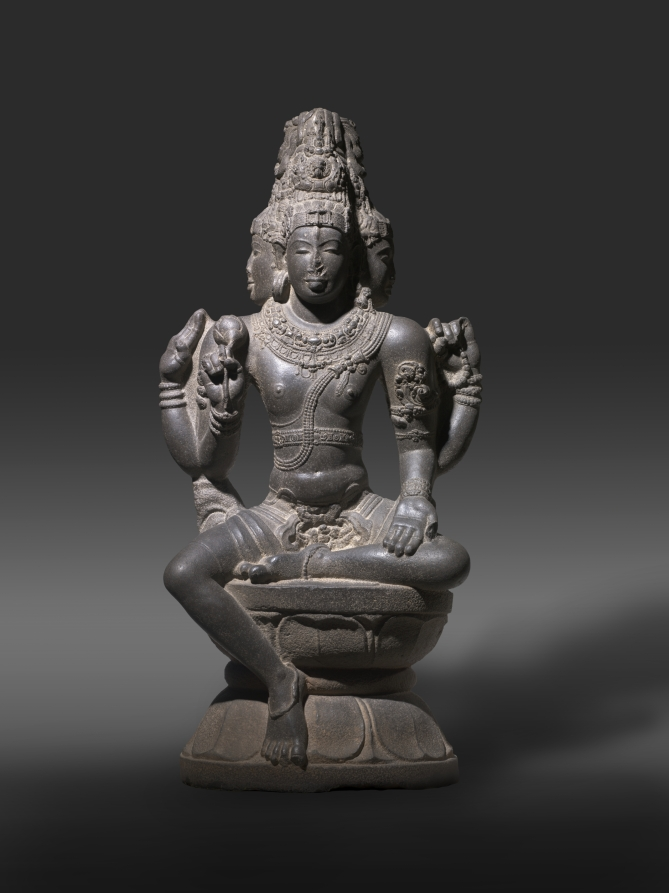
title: Brahma-Shiva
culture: South India, Tamil Nadu, Chola dynasty, late 10th - early 11th century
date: late 900s–1000s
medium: granite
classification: Sculpture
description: In the Hindu pantheon Brahma is in charge of carrying out the work of creation. In this tour-de-force of South Indian temple sculpture, he is in a special regal aspect, with the only elements of his typical priestly appearance being the prayer beads and the matted dreadlocks piled on his head. Four arms connote superhuman power, and four heads convey the idea that his creative activities spread in all four directions. His upper right hand enjoins freedom from fear, and the lower holds a lotus bud associated with birth and the process of creation. His lowered left hand is held in the gift-giving gesture, suggestive of the gift of creation he will bestow upon the world.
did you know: The back of the sculpture retains the original textured surface from a pointed chisel, suggesting it was in a niche or near a wall, protected from worshippers’ touches.